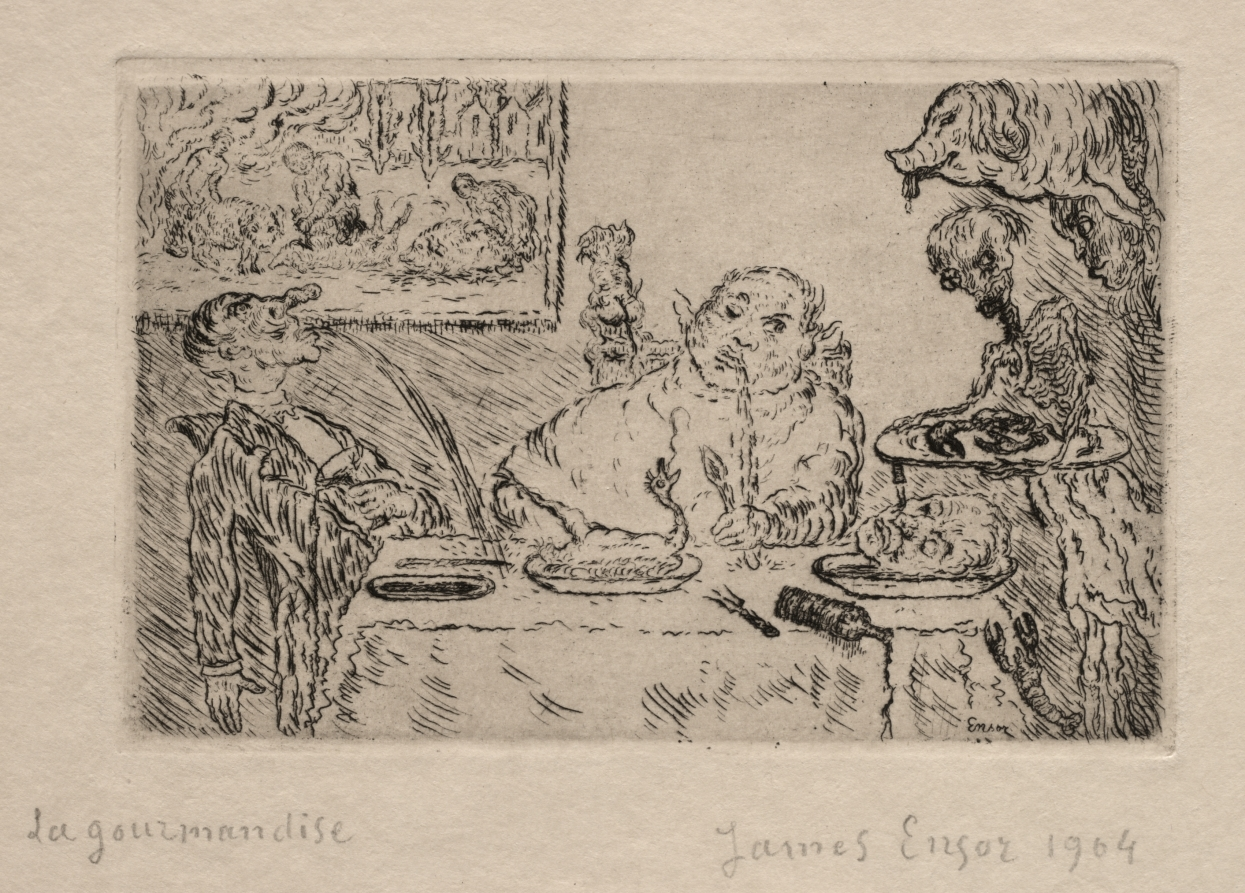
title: The Seven Deadly Sins: Gluttony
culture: Belgium, 19th-20th Century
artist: James Ensor (Belgian, 1860–1949)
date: 1904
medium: etching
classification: Print